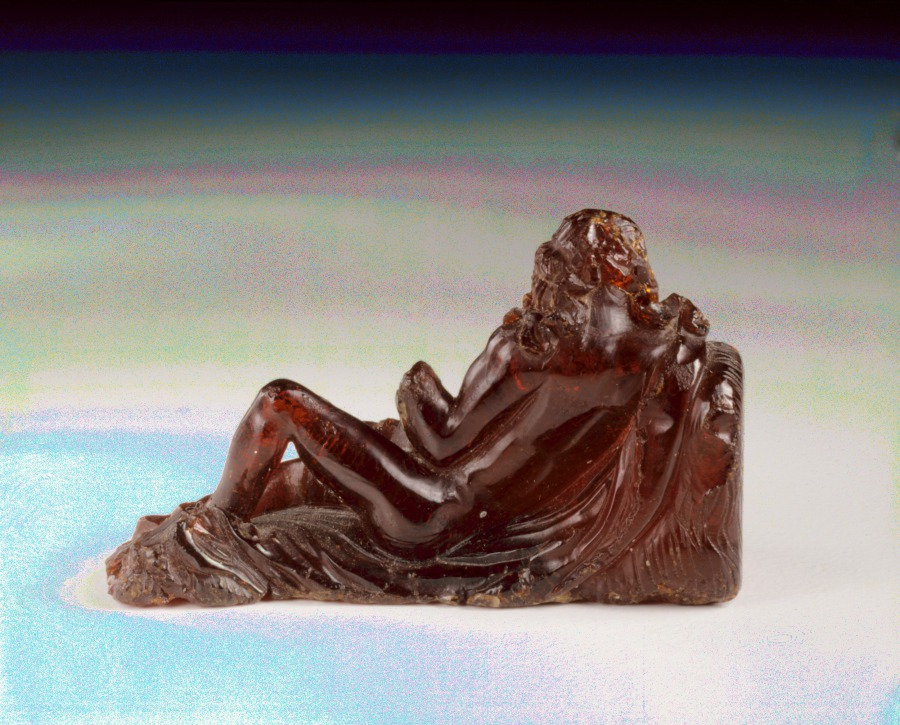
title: Statuette of a Reclining Woman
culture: Greek, Hellenistic, or Roman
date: c. 100 BCE–100 CE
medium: amber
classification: Sculpture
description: This tiny statuette is made from amber, or fossilized tree sap. A nude woman reclines against a rocky feature, surrounded by sumptuous piles of fabric which wind around her right arm and leg. Her gaze is upturned, loose hair framing her face. There are cracks throughout the figure, and she is missing both hands and some of her face. She may represent a nymph or maenad.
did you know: Amber can range in color from bright yellow to deep red depending on its origins.